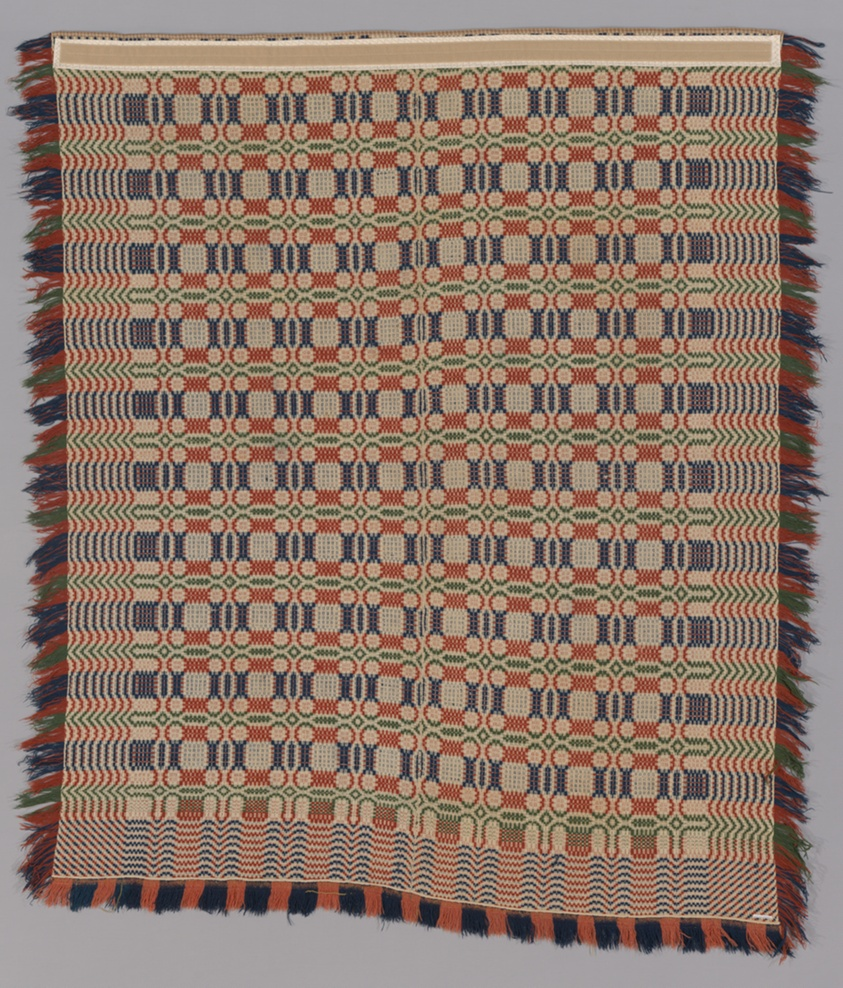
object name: Textile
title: Coverlet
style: 19th century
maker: United States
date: 1820s/30s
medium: Cotton and wool, plain weave with supplementary patterning wefts (overshot) and extended supplementary patterning weft fringe; bottom edged with wool, plain weave with extended ground weft fringe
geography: United States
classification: weaving - coverlet; coverlet; textile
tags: geometric motif, lines, diamond shapes, geometric, squares, coverlet